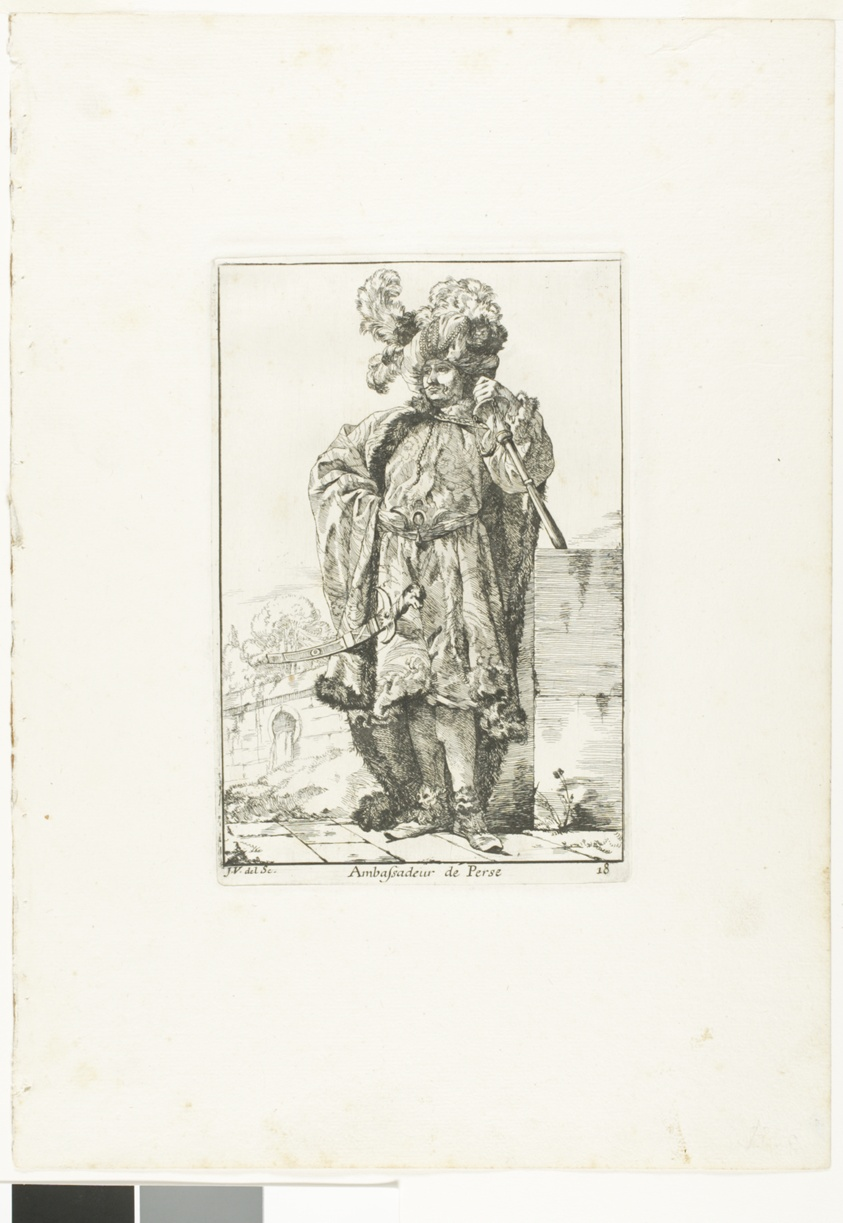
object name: Print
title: The Persian Ambassador, plate eighteen from Caravanne du Sultane à la Mecque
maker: Joseph-Marie Vien, the elder; French, 1716–1809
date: 1748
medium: Etching on ivory laid paper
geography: France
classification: etching; print; prints and drawing